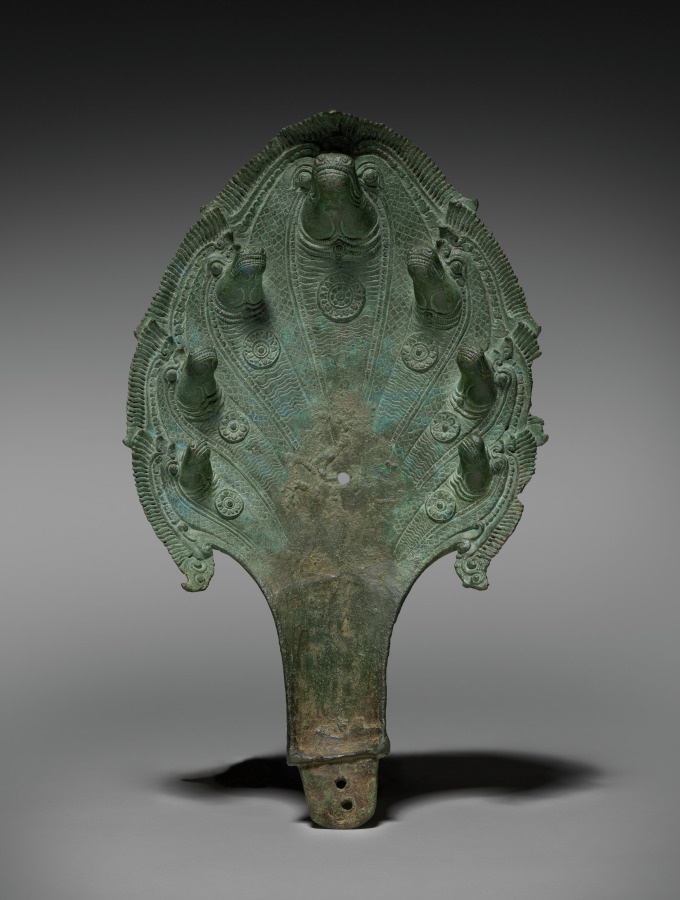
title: Naga-enthroned Buddha (serpent hoods)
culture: Cambodia, Angkor, Angkor Wat Period, 12th century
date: 1100–1150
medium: bronze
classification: Sculpture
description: Jayavarman VII, who built the great royal temple at Banteay Chhmar, linked himself with the image of the Buddha seated on a serpent, or naga, as the divine form under which he would be honored. During his reign, the naga-enthroned Buddha became a ubiquitous image for veneration, often set up together with Lokeshvara, who was associated with his father, and Prajnaparamita, the form under which his deceased mother was honored. Lokeshvara is the powerful enlightened being of compassion, while Prajnaparmita is the goddess who personifies wisdom. King Jayavarman VII, therefore, presented himself as the enlightened Buddha, the product of the union of Compassion and Wisdom, supported and glorified by the naga, which refers to the Khmer people. Images of the naga-enthroned Buddha have been found at Banteay Chhmar, both in architectural relief sculpture and as icons in the round. After the death of Jayavarman VII, followers of other forms of Buddhism (for example, Theravada) that became prevalent in Cambodia changed the meaning of the naga-enthroned Buddha and reinterpreted the image to refer to a scene from the historical Buddha’s life story in which a serpent protected him from a flood. The crowned and bejeweled aspect of this Buddha, though, indicates that it is another kind of transcendent figure. In his lap his hands are in a posture of meditation, holding what appears to be an offering of ceremonial rice referring to the hope that he will ensure the prosperity of the land.